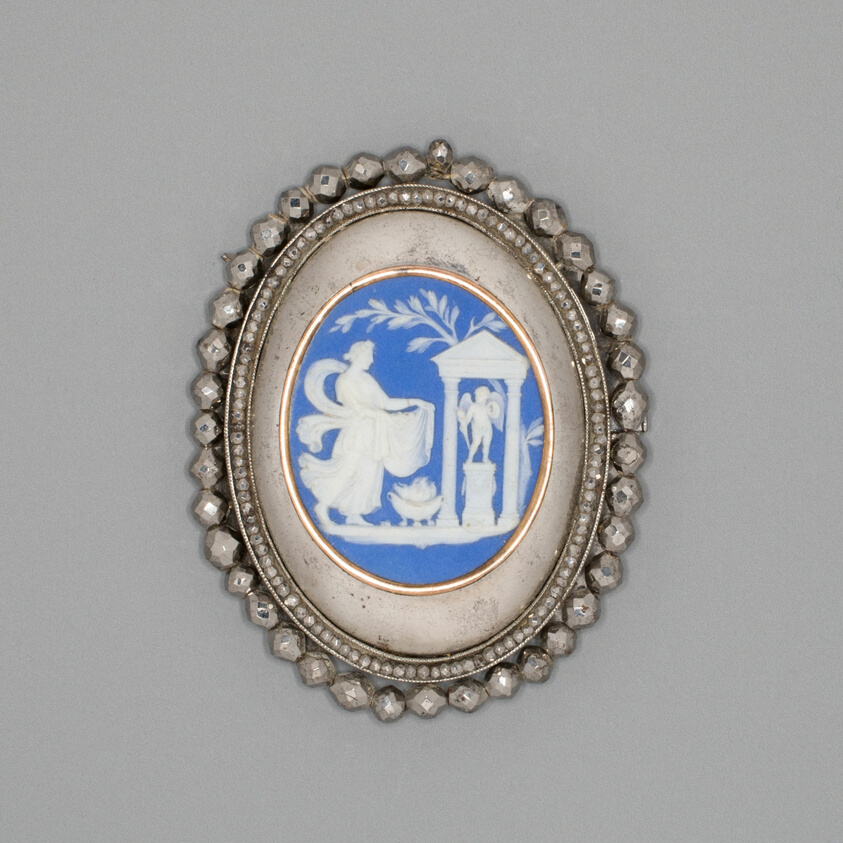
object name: Ceramics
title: Medallion with Sacrifice to Hymen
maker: Wedgwood Manufactory (England, founded 1759)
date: Late 18th century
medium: Stoneware (jasperware)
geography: Burslem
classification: sculpture; stoneware; european decorative arts; ceramics